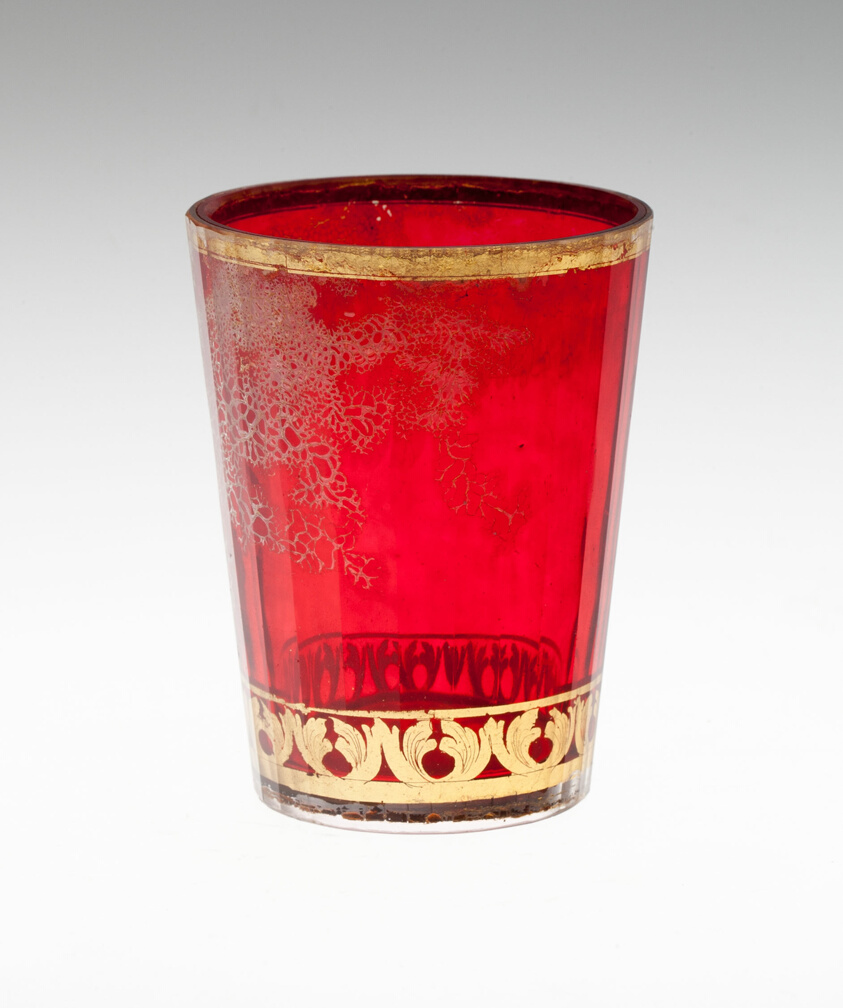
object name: Glass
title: Beaker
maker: Bohemia, Czech Republic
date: c. 1730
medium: Ruby glass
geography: Bohemia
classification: drinking vessel; glass; european decorative arts